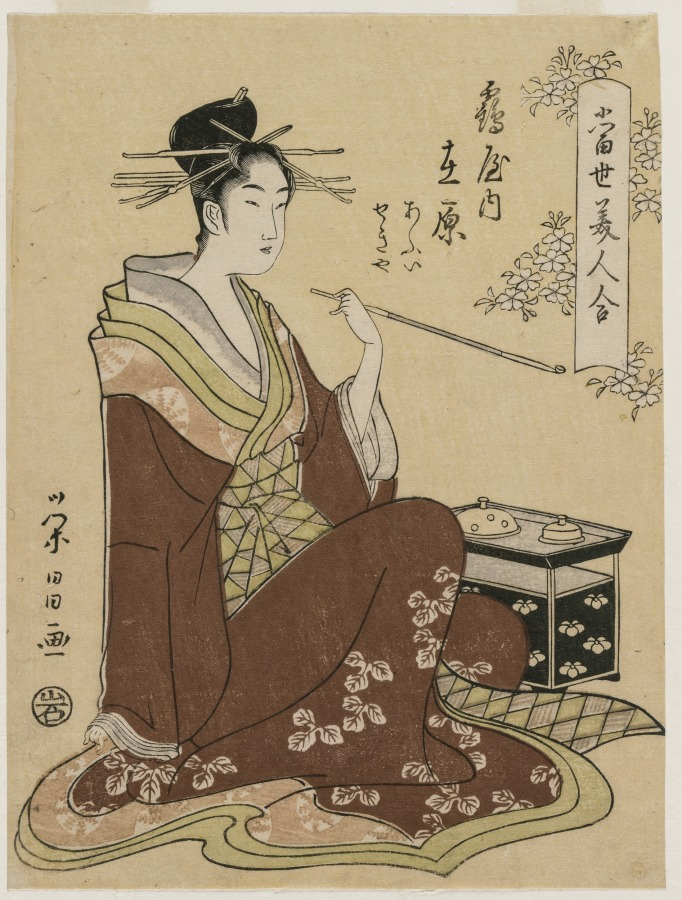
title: The Courtesan Ariwara of the Tsuruya Seated by a Smoking Chest (From the series A Collection of Modern Beauties)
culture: Japan, Edo period (1615–1868)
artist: Chōbunsai Eishi (Japanese, 1756–1829)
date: mid 1790s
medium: color woodblock print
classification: Print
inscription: Signature: Eisho ga